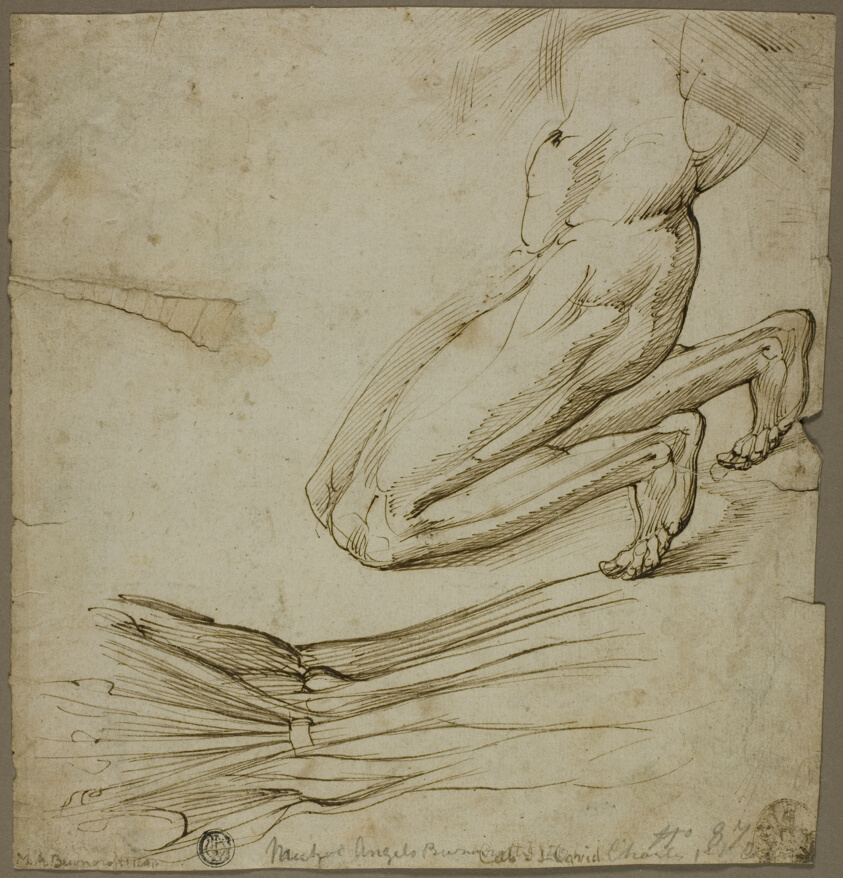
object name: Drawing and Watercolor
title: Anatomical Study and Sketch of Kneeling Figure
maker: Follower of Michelangelo Buonarroti (Italian, 1475-1564)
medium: Pen and brown ink on ivory laid paper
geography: Italy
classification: pen and ink drawings; drawings (visual works); prints and drawing